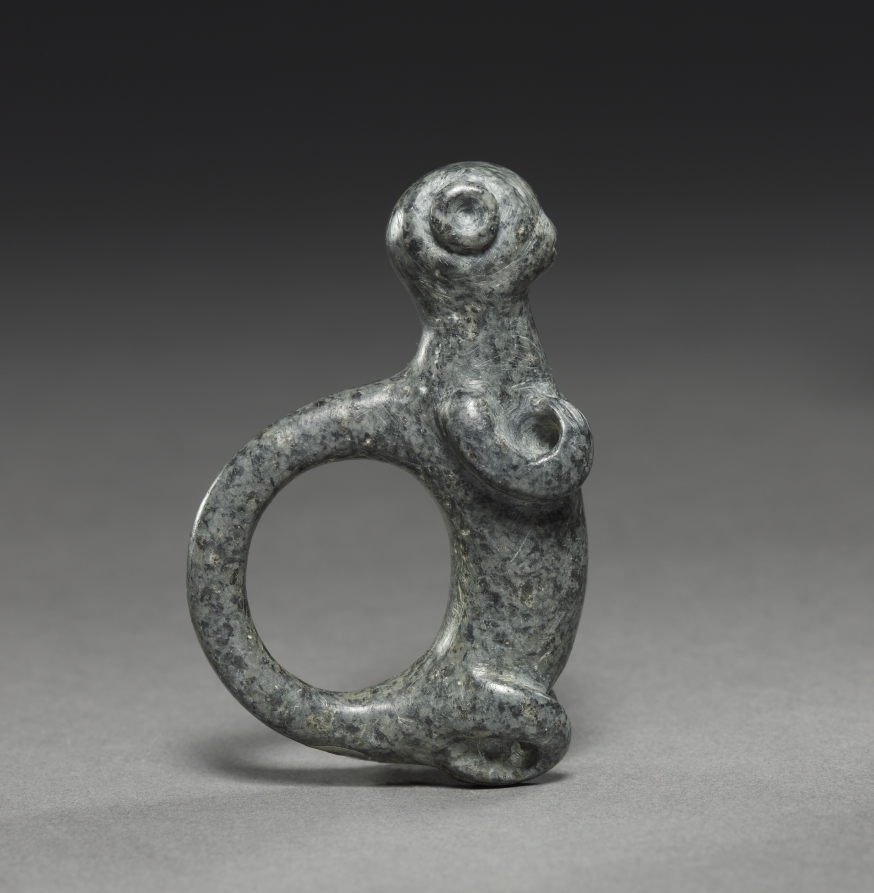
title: Monkey Pendant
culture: Panama, International Style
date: c. 400–900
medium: stone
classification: Sculpture